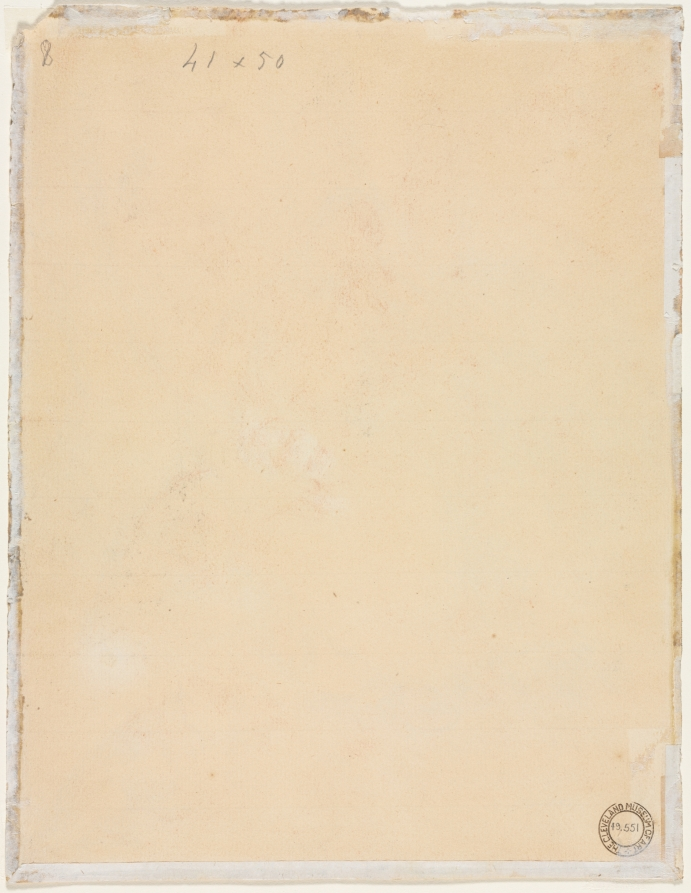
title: Peasant Girl with Dog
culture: France, 19th century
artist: Pierre-Auguste Renoir (French, 1841–1919)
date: c. 1894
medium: red chalk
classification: Drawing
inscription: signed, lower left, in red chalk: Renoir ; verso, upper left, in graphite: 8 ; upper left, in graphite: 41 x 50 ; lower left, on paper strip mounted to sheet, in graphite: 77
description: During the last decades of his career, Renoir worked prolifically in red chalk, which was used to develop a loose and sketchy style. In this drawing, the artist attempted to recapture the spontaneity that characterized Impressionist art a few decades earlier. By showing a young girl seated resting peacefully alongside a bale of hay, he idealized rural French life.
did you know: The art historian John Rewald supposedly called this work "one of the two or three most beautiful Renoir drawings in America."